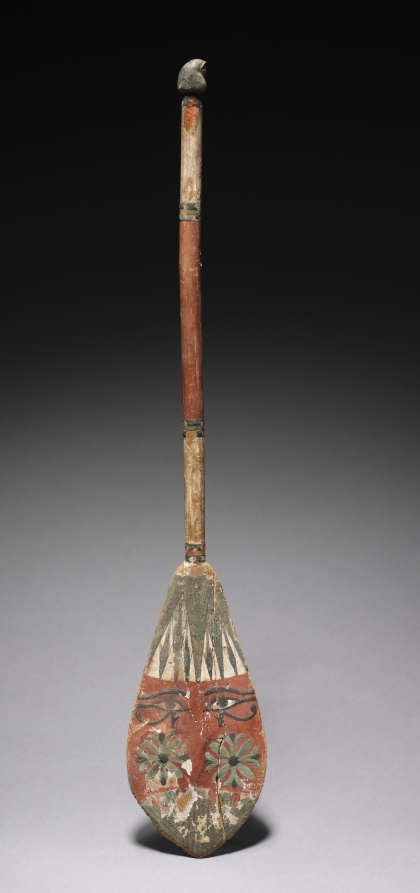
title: Model Steering Oar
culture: Egypt, Middle Kingdom (2040–1648 BCE)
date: 2040–1648 BCE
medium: painted tamarisk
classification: Funerary Equipment